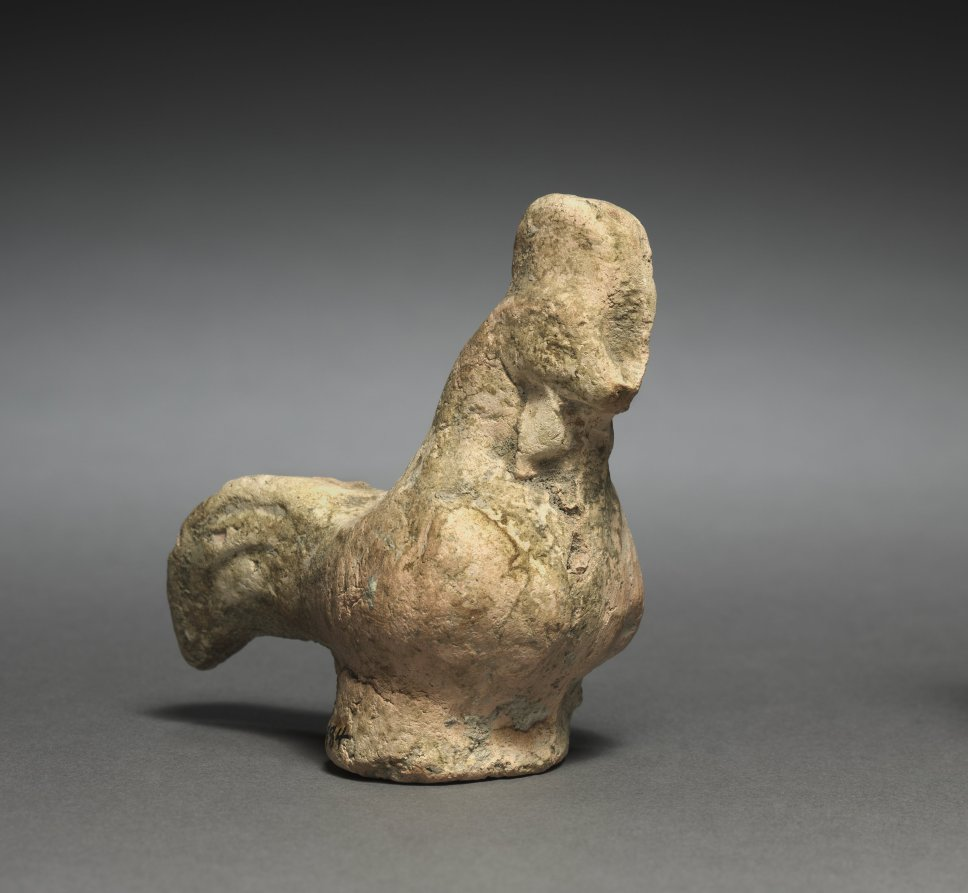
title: Figurine - Rooster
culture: Parthian Empire (247 BCE–224 CE)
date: 1–200 CE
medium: terracotta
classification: Sculpture